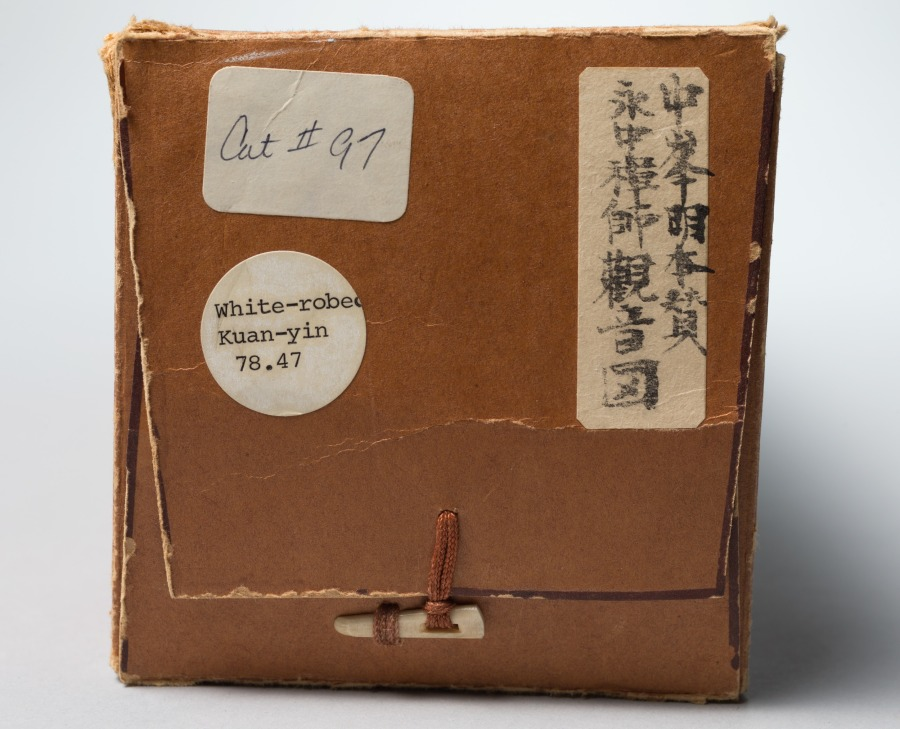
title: White-Robed Guanyin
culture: China, Yuan dynasty (1271-1368)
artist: Jueji Yongzhong (Chinese, active around 1300)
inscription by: Zhongfeng Mingben (Chinese, 1263–1323)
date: late 1200s–early 1300s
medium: hanging scroll; ink on paper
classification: Painting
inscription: Artist's signature: Huanzhu Yongzhong. Inscription by Zhongfeng Mingben: The right thinking [Samkalpa] is embodied within His deep meditation on the Buddha [naga-samadhi]. Retaining not even one single object of thought, A perfect harmony was wonderfully achieved. In the endless time and space, His all-embracing compassion prevails. [signed] Mingben of Huanzhu paying his respects.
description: Guanyin, the bodhisattva of infinite compassion (Avalokiteshvara, in Sanskrit), reveals himself in many forms. According to Buddhist belief, one such manifestation is the white-robed Guanyin sitting on a rock on the island of Putuo (Potalaka, in Sanskrit), located along the coast not far from Ningbo, in Zhejiang Province, China. Here, the figure was swiftly drawn in only a few ink lines. The inscription above is by Zhongfeng Mingben, perhaps the most widely respected and influential Chan (Zen in Japanese) master in the Yuan dynasty. The artist’s signature is a single line below on the left: Huanzhu Yongzhong.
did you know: The CMA collection includes a drawing by a Japanese priest, CMA 1978.47.2, inspired by this composition.